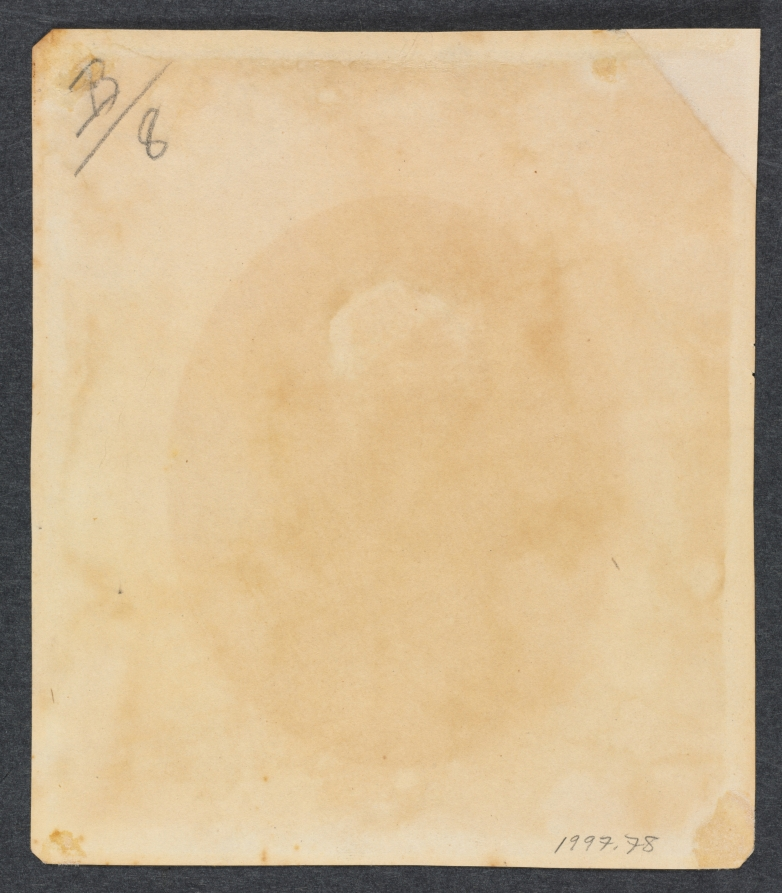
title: Portrait of Miss Mary Tadman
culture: England, 18th century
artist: John I Smart (British, 1741–1811)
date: 1809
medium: watercolor and graphite, heightened with traces of white gouache on paper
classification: Portrait Miniature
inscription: signed, lower right, in gray watercolor: John Smart pinxit / Novr. 1809 ; by artist, lower left, in gray watercolor: Miss Mary Tadman ; VERSO, upper left, in graphite: B/8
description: Mary Tadman’s head and shoulders face right. Her eyes are brown, and she wears a necklace of small pearls and a drop pearl earring. She wears her dark brown hair high in a classically inspired bun, with a braid across the hairline and many curls falling over her forehead and in front of her ears. Her white dress is delicately embroidered at the edges along the bust and is tied at the empire style waist, with a small pin fastened to the front. The translucent white sleeves worn beneath the dress are probably made of muslin and detachable, since they do not appear in the ivory version of the portrait. Detachable sleeves were popular during the late eighteenth and early nineteenth centuries and enabled a dress to function as day- and eveningwear. The nature of this work as a finished drawing rather than exclusively a preparatory sketch for a miniature on ivory is evident in the degree of finish of the sitter’s clothing, heightened with white gouache and painted to the elaborated penciled oval border. In December 1809, the year this drawing was executed, Mary Tadman (1786–1862) married Major William Jolliffe Eldridge. He died in 1818 in Poona, India, and three years later, his widow married Colonel Daniel Hutchins Bellasis (1785–1836), with whom she had two children: Flora and Augustus Fortunatus. Mary lived for nearly two decades in India, where she was a celebrated beauty, and where her second marriage into the militarily distinguished Bellasis family seems to have secured her presence in high society. On the occasion of her marriage in 1821, she wrote her spinster sister, “I forgot I have not told you a word of my marriage, which by the by was the grandest affair known in Bombay, I am almost tired of the subject—visits and congratulations, etc. The Governor and Staff went with me to Church . . . and all the people of any consequence in Bombay about 100 came to a Breakfast at Randall Lodge—since which it has been one constant scene of gaiety. Last week, pity me when I tell you, how I was obliged to exert myself—we gave a dinner party to 40 people. The Governor’s family . . . and all the Big Wigs who gave me parties—the same evening 160 came at ten to a dance—afterwards a supper very splendid I assure you.” A related ivory version of this miniature is in the Fitzwilliam Museum, Cambridge, signed and dated at the lower left: “J S / 1809.” While Miss Tadman’s coiffure, countenance, jewelry, and dress are identical to the Cleveland sketch, in this portrait she wears an elaborate black and red, flowered Indian shawl with white border over her white dress, the under-sleeves omitted. Indian shawls, particularly those from Kashmir, were extremely expensive signifiers of social status in India and Europe, and by the end of the eighteenth century, they often formed part of the trousseau of a wealthy French or English bride. The shawls were particularly fashionable worn in contrast with the high-waisted gauzy white dresses of the Empire period. While many portraits and miniatures from the early nineteenth century depict women conspicuously displaying their Indian shawls, Miss Tadman wears hers in a manner not often seen in European portraits: across one shoulder and around the waist, like a sari. Mary and William Eldridge wed in December 1809, one month after Smart signed this sketch. Because Smart depicted Miss Tadman during her engagement, the shawl worn in the finished ivory portrait may have been a gift from her betrothed, who had been stationed in Bombay in 1809. While appropriate for a half-length portrait, the under-sleeves were probably deemed unnecessary for the miniature, which shows little of the arm and instead depicts the sitter more formally, wrapped in her shawl. The existence of a larger, finished drawing as well as a miniature on ivory suggests that the finished drawing may have served a variety of roles, while also implying that another preparatory sketch for both may exist. At nearly twice the size of the ivory, Cleveland’s drawing is not likely to have been the sole preparatory exercise for the finished miniature. There is no question that as a young bride-to-be, Miss Tadman was thinking carefully about how she wished to be represented at a pivotal moment in her life, and that a single portrait was insufficient to accommodate all of the accoutrements that were of significance to her. The neo-Grec coiffure, au courant empire waist dress with detachable sleeves, pearl parure, ornamental pin, and costly shawl communicate clearly the social ambitions to which her biography is also a testament.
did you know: This drawing was passed on through the generations of the artist John Smart's family until 1937 when his great-granddaughter sold it.